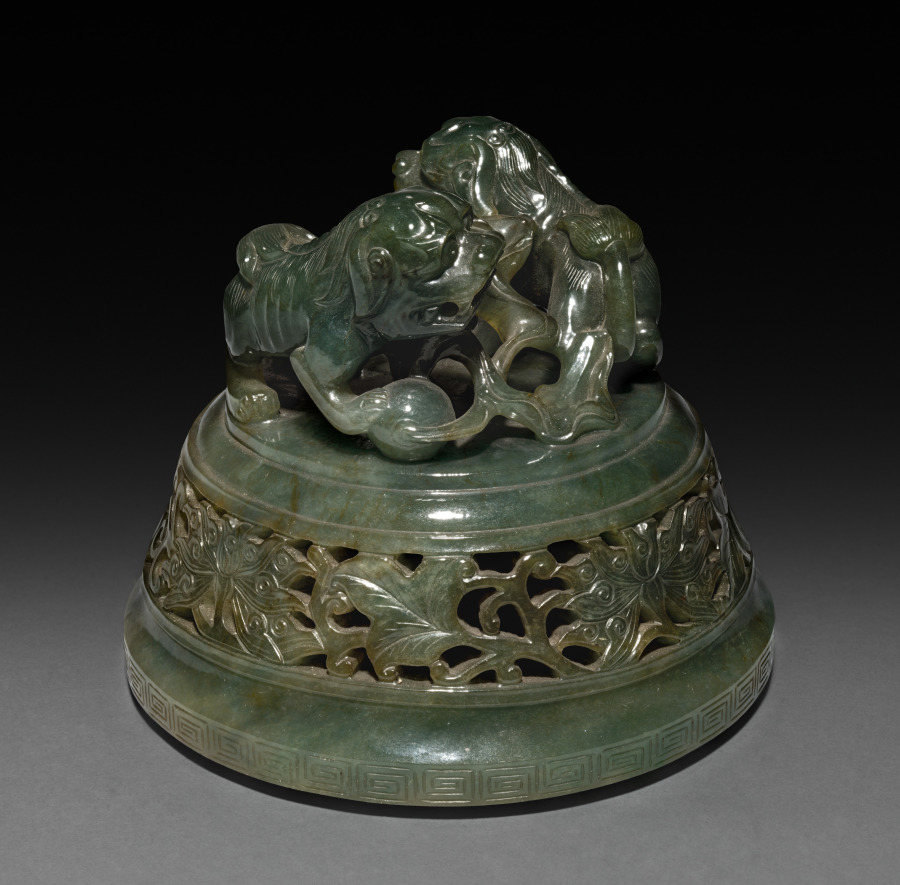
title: Koro (lid)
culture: China, Qing dynasty (1644–1911), Qianlong reign (1736–95)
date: 1736–95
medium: jade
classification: Jade